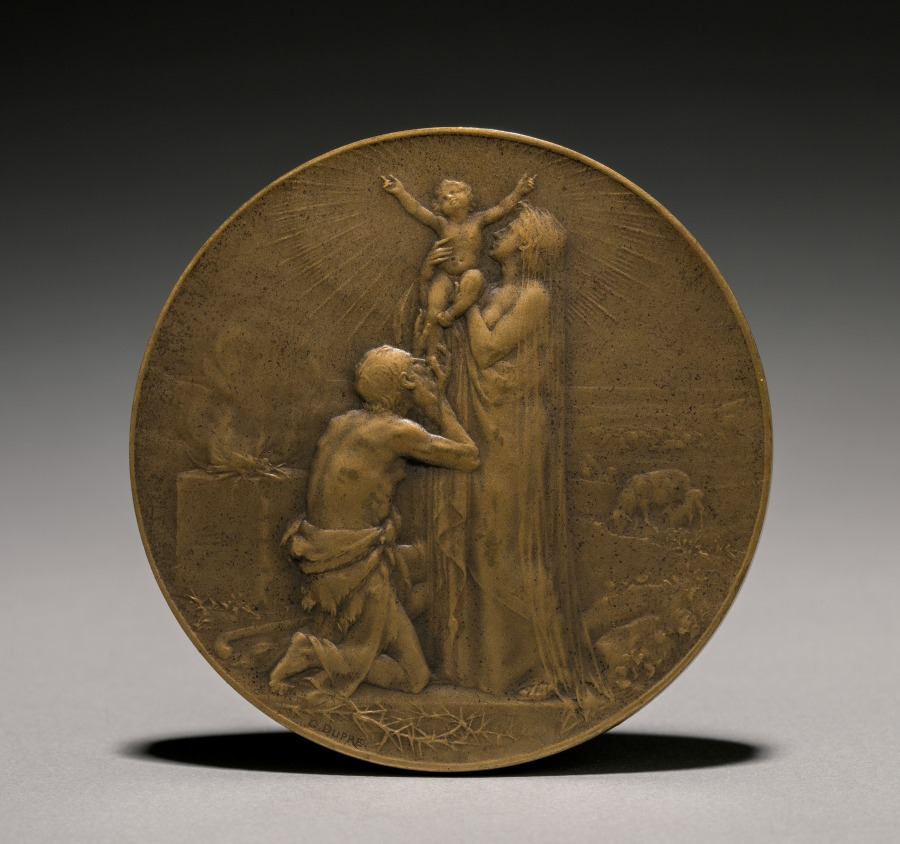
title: Medal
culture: France, 19th century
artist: Jules Dupré (French, 1811–1889)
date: 1800s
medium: bronze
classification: Metalwork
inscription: reverse - "O Crux ave spes unica."